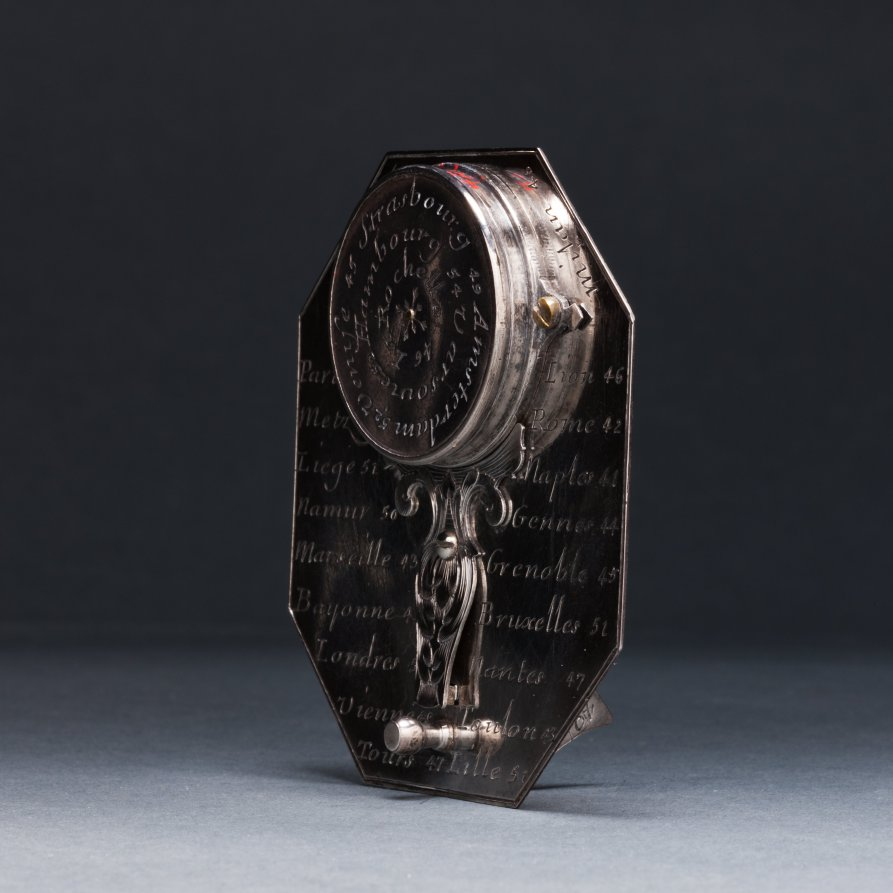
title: Butterfield Sundial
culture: France, 18th century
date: 1700s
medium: silver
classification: Silver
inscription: [Engraved signature above the compass in ribbon band]: "N. BION A Paris"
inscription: [Engraved on the face of the sundial]: “Pour 55° 4-5-6-7-8-9-10-11 50° IIII-V-VI-VII-VIII-IX-X-XI 45° 5-6-7-8-9-10-11 40° -VI-VII-VIII-IX-X-XI'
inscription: [Engraved on the other side]: "Pour 55° -8-7-6-5-4-3-2-1-0 50°-VIII-VII-VI-V-IIII-III-II-I 45°-8-7-6-5-4-3-2-1 40°-VII-VI-V-IIII-III-II-I"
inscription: [Engraved around the compass]: “NORD-OUEST-SUD-EST”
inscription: [Engraved on the back of the sundial]: “Turin 44 Milan 46 Paris 49 Lion 46 Metz 49 Rome 42 Liege 51 Naples 44 Namur 50 Gennes 44 Marseille 43 Grenoble 45 Bayonne 43 Bruxelle 51 Londres 52 Nantes 47 Vienne 48 Toulon 43 Tours 47 Lille 51”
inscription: [Engraved around the back of the compass]: “Venise 45 Strasbourg 49 Amsterdam 52 Hambourg 54 Varsovie 52 La Rochelle 46”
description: Butterfield-type sundials are characterized by their adjustable gnomons, metal flaps that cast a shadow on the dial’s face to indicate the hour, and geographical indices. This sundial has a scale adjustable between latitudes of 40° to 60° north. The latitudes of 26 European towns are engraved on its back for quick reference. With an intricately engraved silver face, it would have functioned as a fashionable traveler’s accessory.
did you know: Butterfield-style sundials were named after Micheal Butterfield, an English scientific and mathematical instrument maker who worked in Paris between 1674 and 1724.